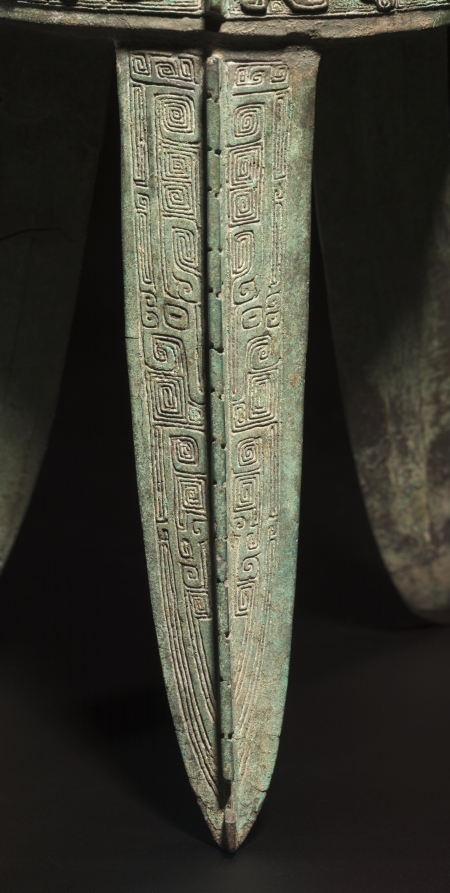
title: Wine Vessel (Jia)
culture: China, Shang dynasty (c. 1600–c. 1046 BCE), Anyang phase (c. 1250–1046 BCE)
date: c. 1250–1046 BCE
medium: bronze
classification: Metalwork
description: This large wine vessel (or jia) is among those very rare, monumental pieces uncovered from Anyang, the last royal capital of the Shang dynasty (c.1700–c.1100 BCE). Probably very few monumental bronze vessels were ever made; each of them must have cost a fortune and was used to designate high-ranking (often royal) status. Even fewer have survived. This wine vessel was used for the ancestral rites of the Shang. Its three splayed legs supported the cup over a fire, suggesting that the wine might be heated. Offering wine and food to their departed ancestors was an essential ritual practice performed by the Shang royalty and aristocracy. The Shang people believed that their ancestors were able to intercede with the high god to confer fruitful harvests and victories in battles. Their ritual actions involved communication with the supernatural realm (and this was further supported by the practice of divination with the use of a tortoise shell or a cattle shoulder blade). Here, the animal mask on the bronze vessel stares frontally at the viewer and serves symbolically as a messenger of communication with the ancestors. It conjures up the potency of mystery, whereas the static monumentality of the bronze vessel lends an air of dignified solemnity to the ritual ceremony.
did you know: Ancient bronze vessels are ritual and religious in nature, linked inextricably to political legitimization, and are source materials for Chinese historiography and traditional antiquarianism.